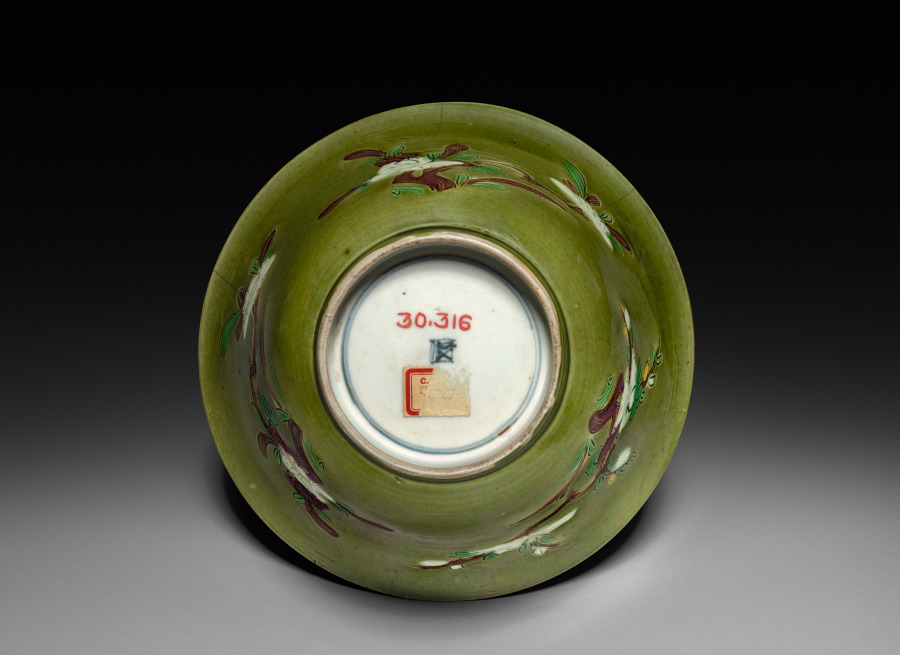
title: Brinjal Bowl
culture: China, Ming dynasty (1368–1644) to Qing dynasty (1644–1911)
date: 1368–1644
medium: white porcelain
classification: Ceramic